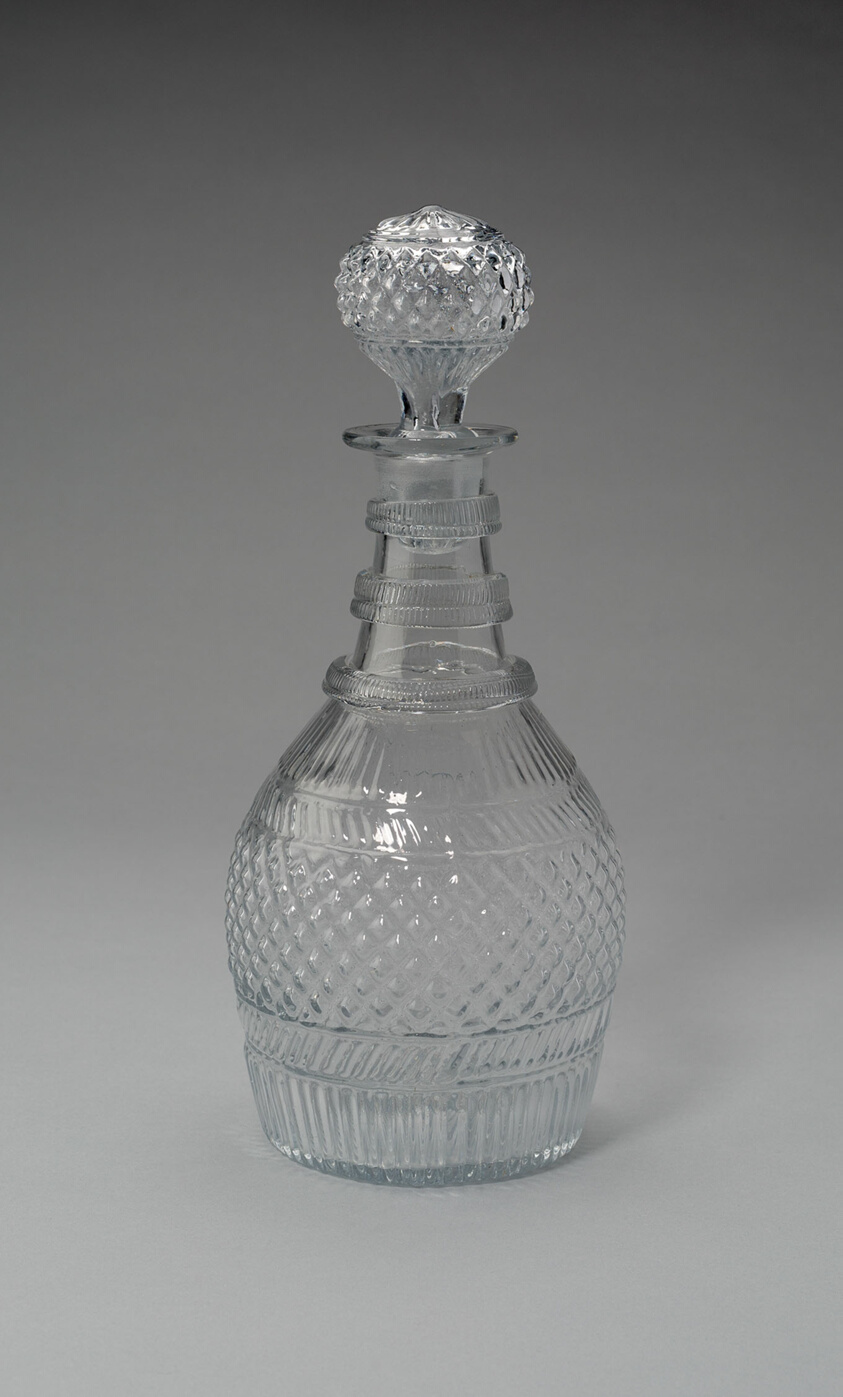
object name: Glass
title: Decanter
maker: Artist unknown (American, 19th century); Eastern United States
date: 1815–35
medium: Mold-blown glass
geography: United States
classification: bottle; glass; american decorative arts; european decorative arts; decorative arts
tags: dining, drinking